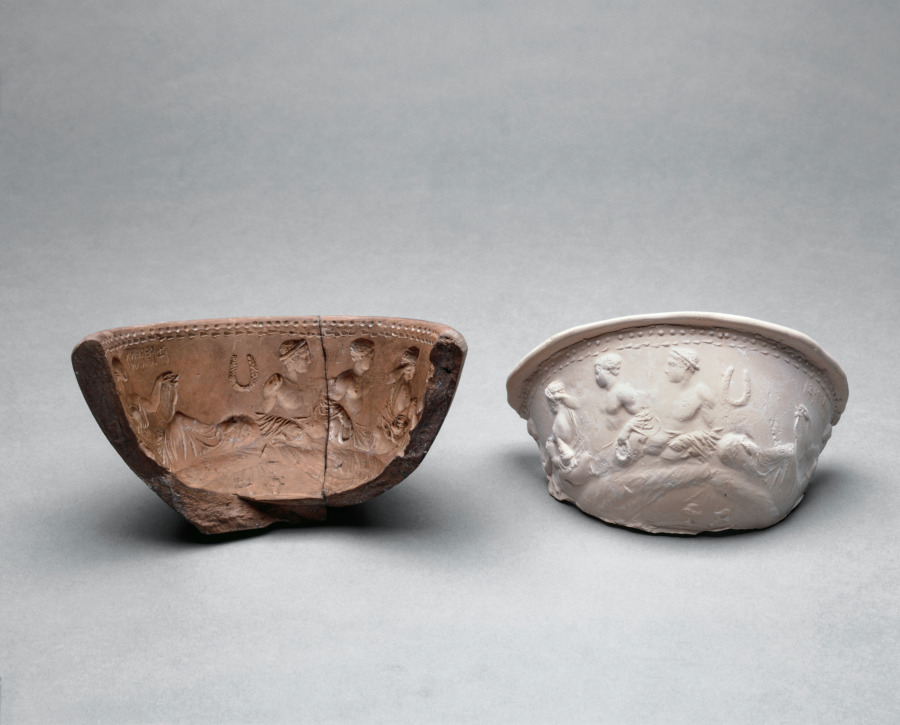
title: Fragment of a Mold for Arretine Bowl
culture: Italy, Roman, Augustan period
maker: M. Perennius (Roman, c. 100 BCE–100 CE)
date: 27 BCE–14 CE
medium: terracotta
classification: Ceramic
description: Preserving nearly half of a mold for a relief-decorated terracotta bowl, these joining fragments show women and youths reclining at a symposium. On one side, a woman passes a bowl or cup to a youth, whom another youth reaches over to crown with a garland or wreath. A third youth reclines beside them, and a second woman sits on the next couch, looking away and holding a lyre on her raised knee. Above, within a stamped rectangle, appears the signature M. PERENN | TIGAANI.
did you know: This mold includes an artist signature, reversed to appear properly in the final product.